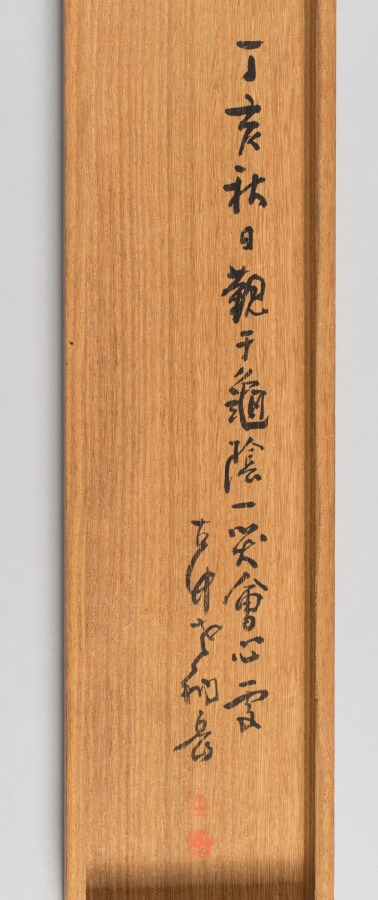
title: Solitary Colors of the Autumn Woods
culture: China, Ming dynasty (1368–1644)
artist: Wang Jianzhang (Chinese, active 1621–1662)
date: first half 1600s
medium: hanging scroll; ink and color on satin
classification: Painting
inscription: Artist's inscription, signature, and 2 seals: Cold frost falls on the fences,/ Solitary colors scatter the maples./ Reciting the chapter of "The Autumn Water,"/ I cannot still the emotion in my old heart. After the style of Fan Hua-yüan [Fan Kuan], Wang Chien-chang . [seals] Wang shih chih yin; Chien-chang. trans. LYSL/HK/WKH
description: Two gentlemen stand outside a thatched hut in a dense forest; some trees have bare branches indicating that the season is early autumn. Wang Jianzhang’s inscribed poem refers to a chapter called “Autumn Water” from Zhuangzi, a famous Daoist text written in the 3rd century BC: "Cold frost falls on the fences, / Solitary colors scatter the maples. / Reciting the chapter of “The Autumn Water,” / I cannot still the emotion in my old heart." Wang Jianzhang lived through the collapse of the Ming dynasty (1368–1644) and the rise of the Qing dynasty (1644–1911), when China was governed by the Manchus, an ethnic people from Manchuria who were traditionally viewed as “barbarians” by the Chinese. The poetic reference to Zhuangzi’s “Autumn Water” seems to discreetly convey Wang’s feelings about his country being taken over. “Autumn Water” was about learning to take steps in the foreign way, but not acquiring a foreign tongue. Perhaps Wang was lamenting his conflicted situation. For survival he had to adapt to the new political and social climate, while still trying to maintain his own identity and Chinese traditions.